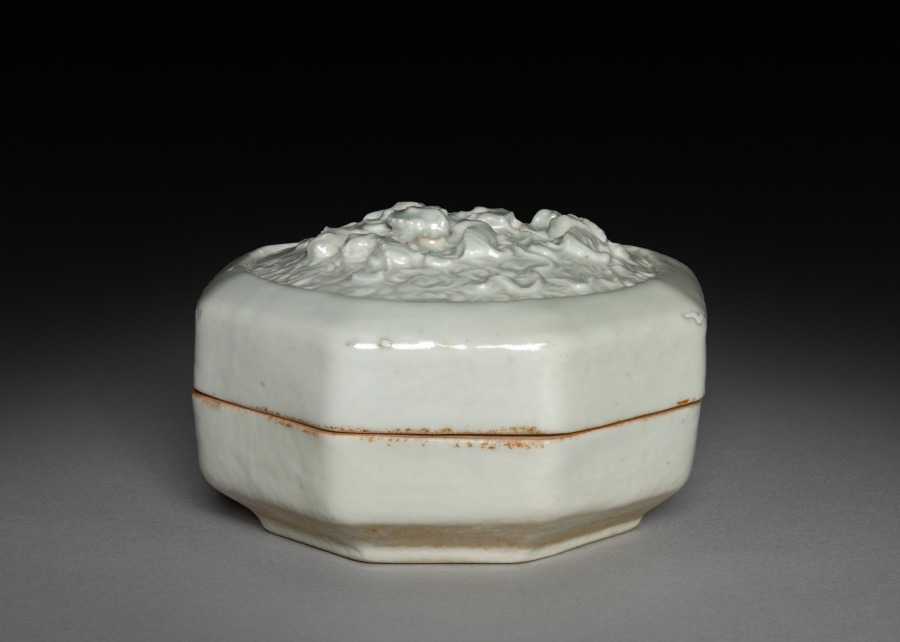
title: Hexagonal Covered Box with Lions in Relief: Qingbai Ware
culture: China, Jiangxi province, Jingdezhen kilns, Yuan dynasty (1271-1368)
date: 1300–1325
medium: glazed porcelain with molded and applied decoration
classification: Ceramic